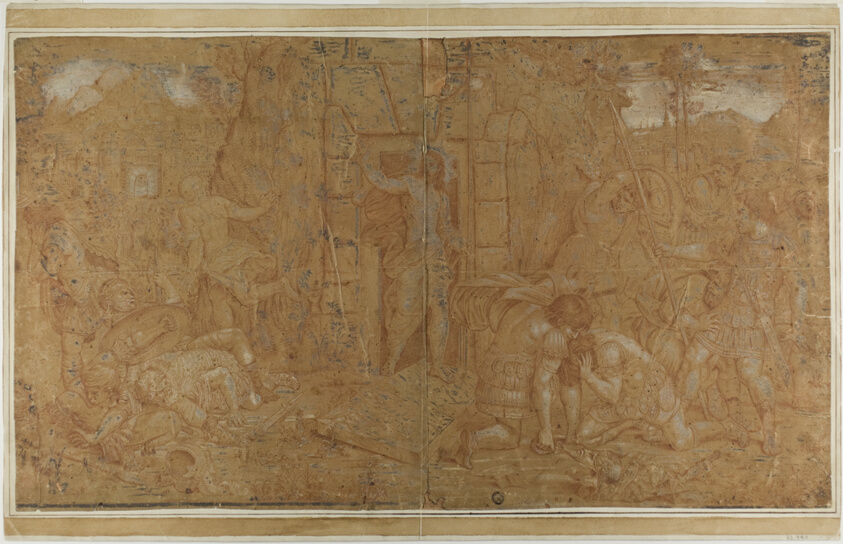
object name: Drawing and Watercolor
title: Resurrection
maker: After workshop of Raffaello Sanzio, called Raphael; Italian, 1483-1520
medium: Red chalk, heightened with lead white (partially discolored), on brown laid paper, laid down on ivory laid card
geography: Italy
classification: chalk; drawings (visual works); prints and drawing